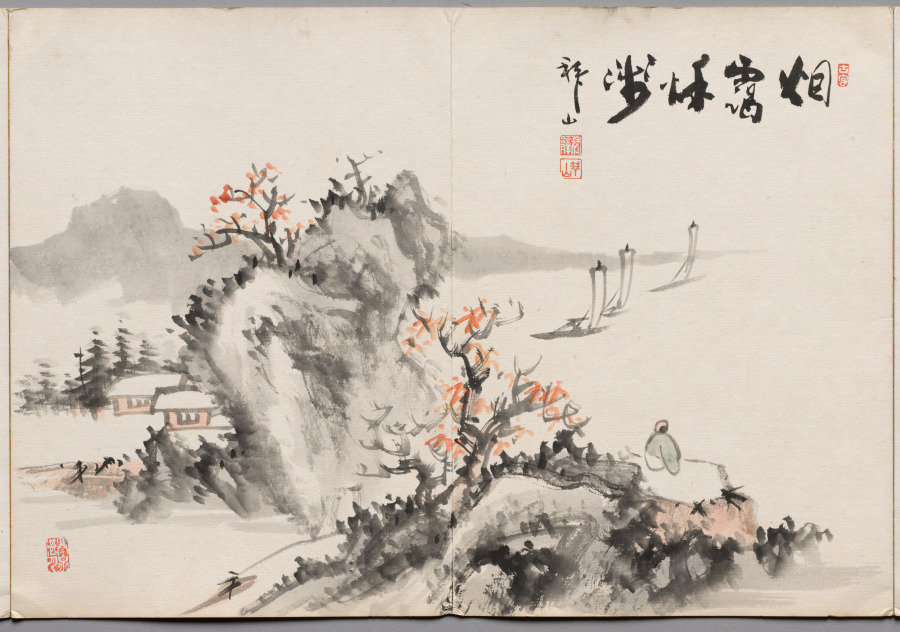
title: Painting Nine from Album of Paintings by Haizan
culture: Japan, Meiji period (1868–1912) or Taishō period (1912–26)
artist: Yoshitsugu Haizan (Japanese, 1846–1915)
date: late 1800s–early 1900s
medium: page spread from double-sided accordion album; ink and color on paper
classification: Painting